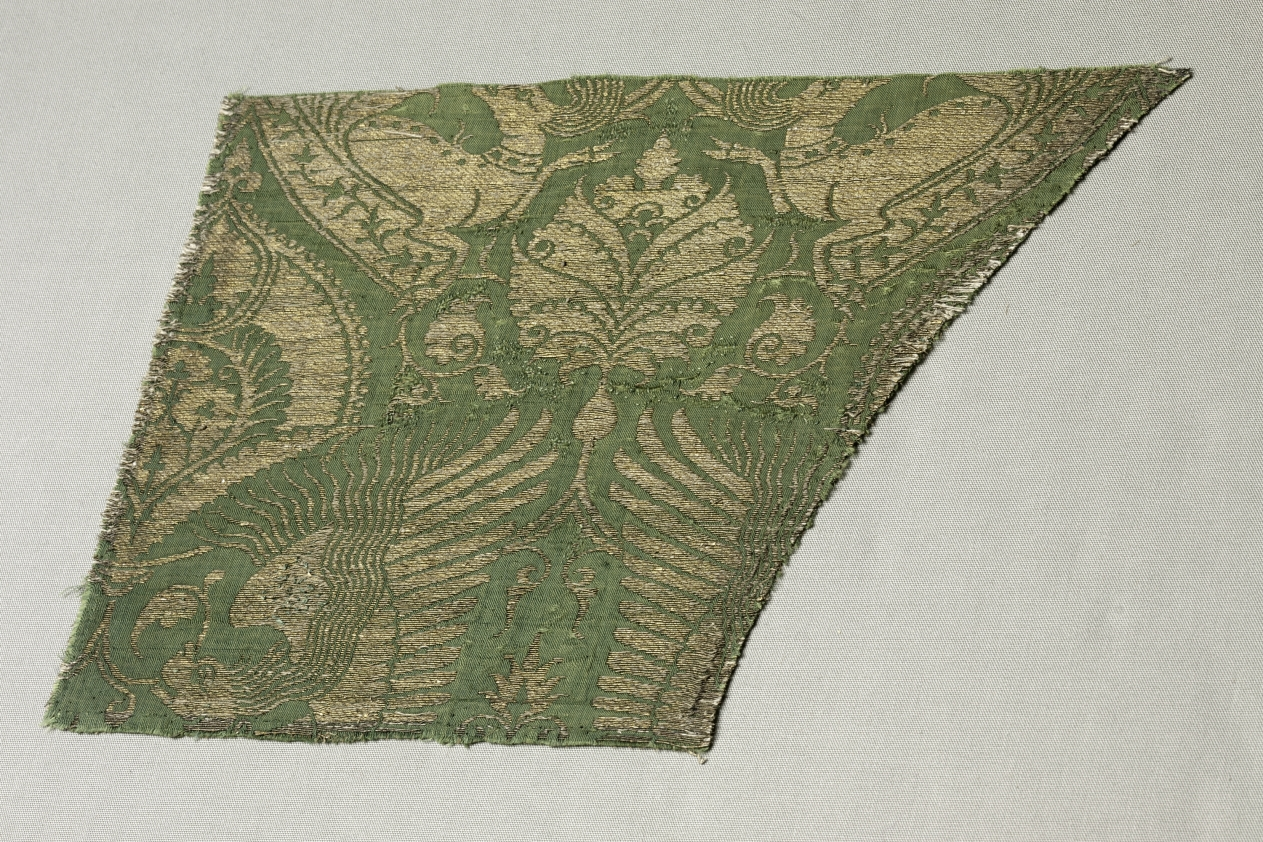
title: Exotic Gold-patterned Silk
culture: Italy, Venice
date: 1360–1400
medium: silk, gold thread; a combination of two weaves, 2/1 twill and 1/3 twill (lampas)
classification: Textile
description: This superb quality silk with radiant gold thread on a rich green ground ranked among the most extravagant textiles woven in Italy during the 1300s. The Italian silk designer combined primarily exotic Chinese and Islamic motifs into the exceptionally dynamic pattern in the international style. Mythical beasts with flaming manes appear amid large palmette leaves. A chasuble in this fabric has survived, hidden during World War II behind a false wall in Saint Mary’s Church in Gdansk, Poland. A remarkably similar silk provides the lavish background in the museum’s painting John the Baptist by the Flemish painter Robert Campin. The display of such luxury continues the practice of using the finest items in the worship of God.